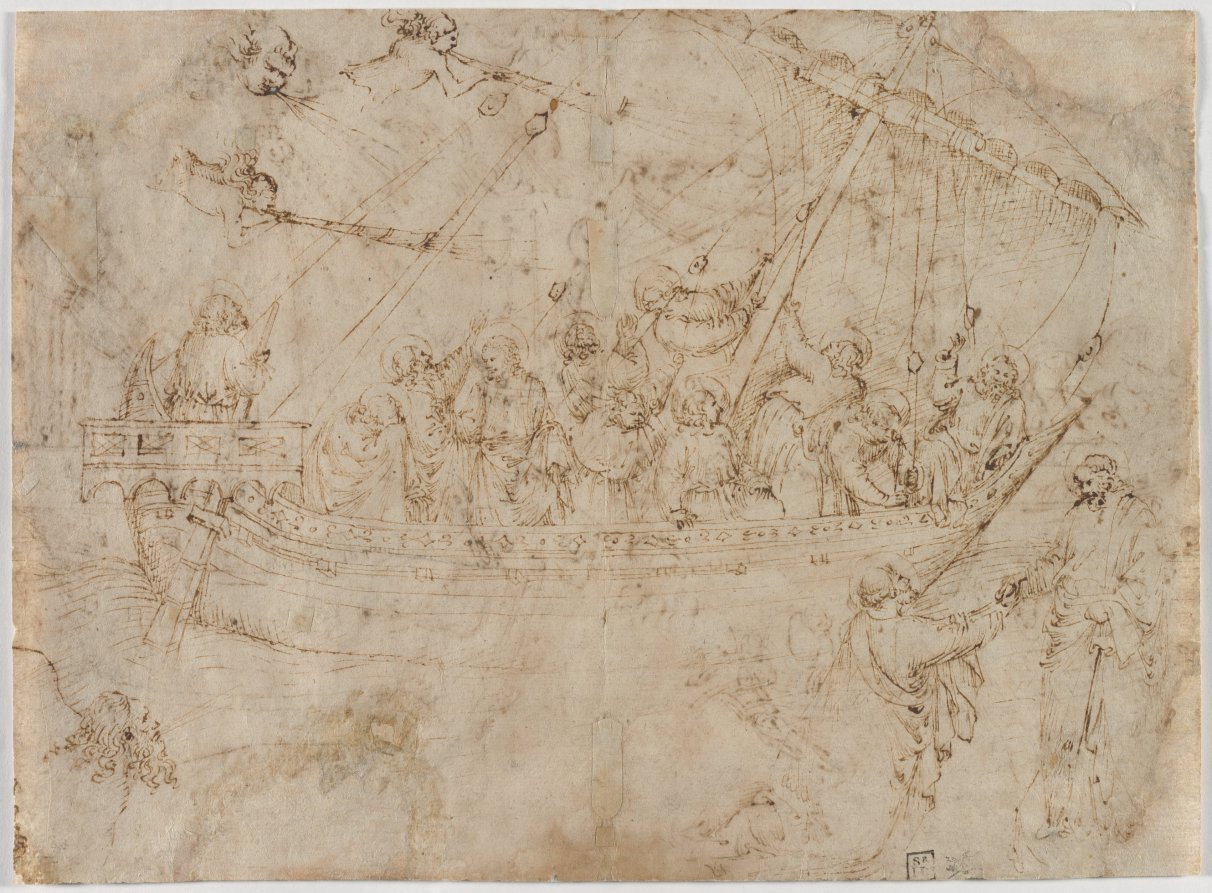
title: Navicella (recto)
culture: Italy, Arezzo, 15th century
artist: Parri Spinelli (Italian, 1387–c. 1453)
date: c. 1410s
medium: pen and brown ink (iron gall)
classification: Drawing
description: Parri Spinelli was most important painter from Arezzo in the early 1300s. About 30 of his drawings are extant, more than for any other artist of the period, when drawing was just beginning to be common to artistic practice. Spinelli used a quill pen and ink on a large sheet of paper to copy the composition of a monumental mosaic by the Florentine artist Giotto that adorned the portico of Old Saint Peter’s Basilica in Rome (since destroyed). In this scene from the Bible, Christ walks on water at right, while Saint Peter kneels before him in front of a ship filled with Christ’s disciples. Spinelli focused on the outlines of the figures, using a limited vocabulary of parallel and perpendicular lines to suggest shallow depth and shadow. Paper was rarely wasted. On the other side of the sheet (1961.38.b), Spinelli continued the copy, rendering two large ships and two rowing boats full of people.The drawing formed part of a model or pattern book that Spinelli would have kept in his studio. The book was broken up, probably as early as the 1500s, and two other drawings with the same subject—in the Metropolitan Museum of Art, New York, and in the Musée Bonnat in Bayonne—are known.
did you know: Dating from the early 1400s, this drawing by Parri Spinelli is the oldest in the Cleveland Museum of Art's collection.